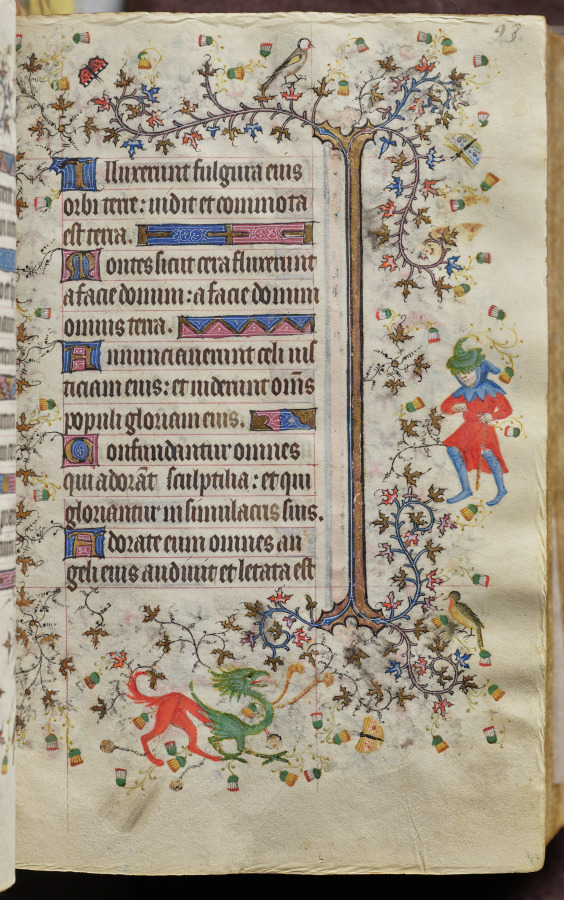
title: Hours of Charles the Noble, King of Navarre (1361-1425): fol. 47r, Text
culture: France, Paris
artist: Master of the Brussels Initials and Associates (French)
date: c. 1405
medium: ink, tempera, and gold on vellum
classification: Bound Volume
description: This precious volume was obviously highly prized by its owner, the French-born King of Navarre, who had his coat of arms painted on no less than twenty folios. Rather than directly commissioning this manuscript from a specific workshop, it seems that Charles the Noble acquired his book of hours -- perhaps ready-made for the luxury market -- while on a trip to Paris in 1404-05. A collaborative effort, six painting styles are evidenced within the pages of this codex, those of two Italians, two Frenchmen, and two Netherlanders. The painter who was responsible for the planning and decoration of the book, and who produced seventeen of the large miniatures, was a Bolognese artist known as the Master of the Brussels Initials. His principal assistant, responsible for most of the borders, was a Florentine who signed his name "Zecho" da Firenze on folio 208 verso.